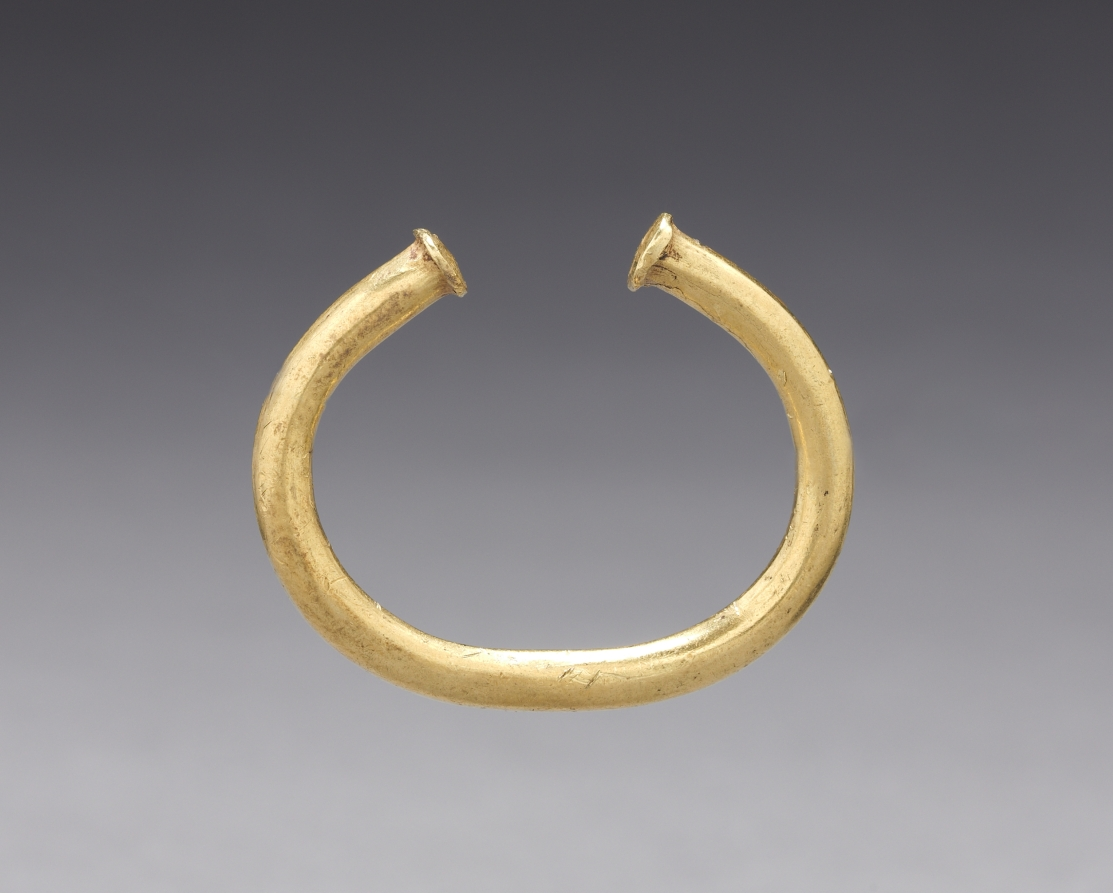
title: Nose Ornament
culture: Colombia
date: before 1550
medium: cast gold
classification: Jewelry